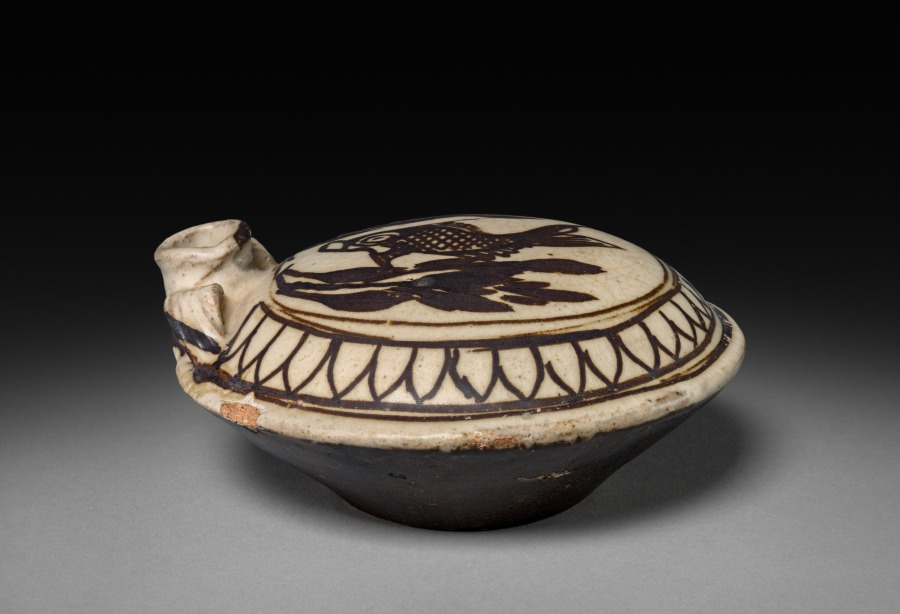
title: Water Dropper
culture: China, Yuan dynasty (1271-1368)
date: 1271–1368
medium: Stoneware, Cizhou ware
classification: Ceramic